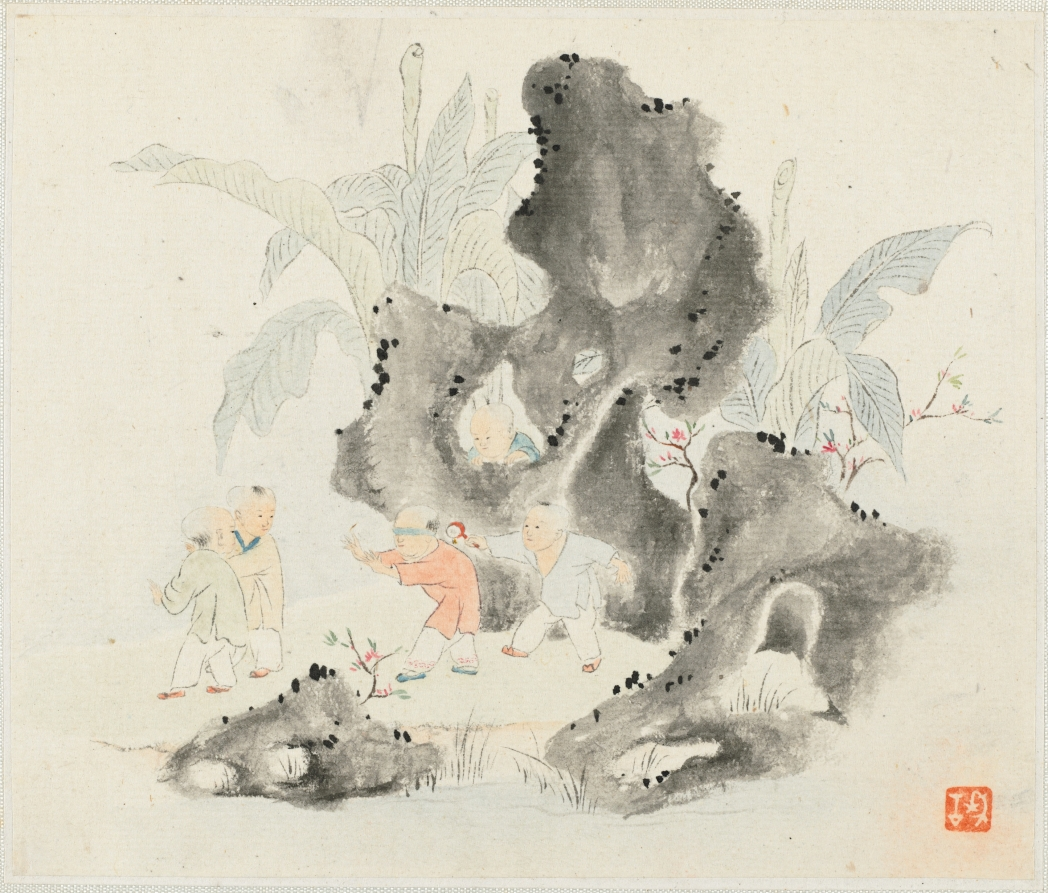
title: Album of Landscape Paintings Illustrating Old Poems: Children Playing Blindman's Buff in a Garden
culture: China, Qing dynasty (1644-1911)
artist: Hua Yan (Chinese, 1682–c. 1765)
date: 1745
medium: Album leaf; ink and light color on paper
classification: Painting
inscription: Seal, lower right corner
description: Hua Yan is one of the Eight Eccentrics of Yangzhou, who rejected orthodox ideas about painting.